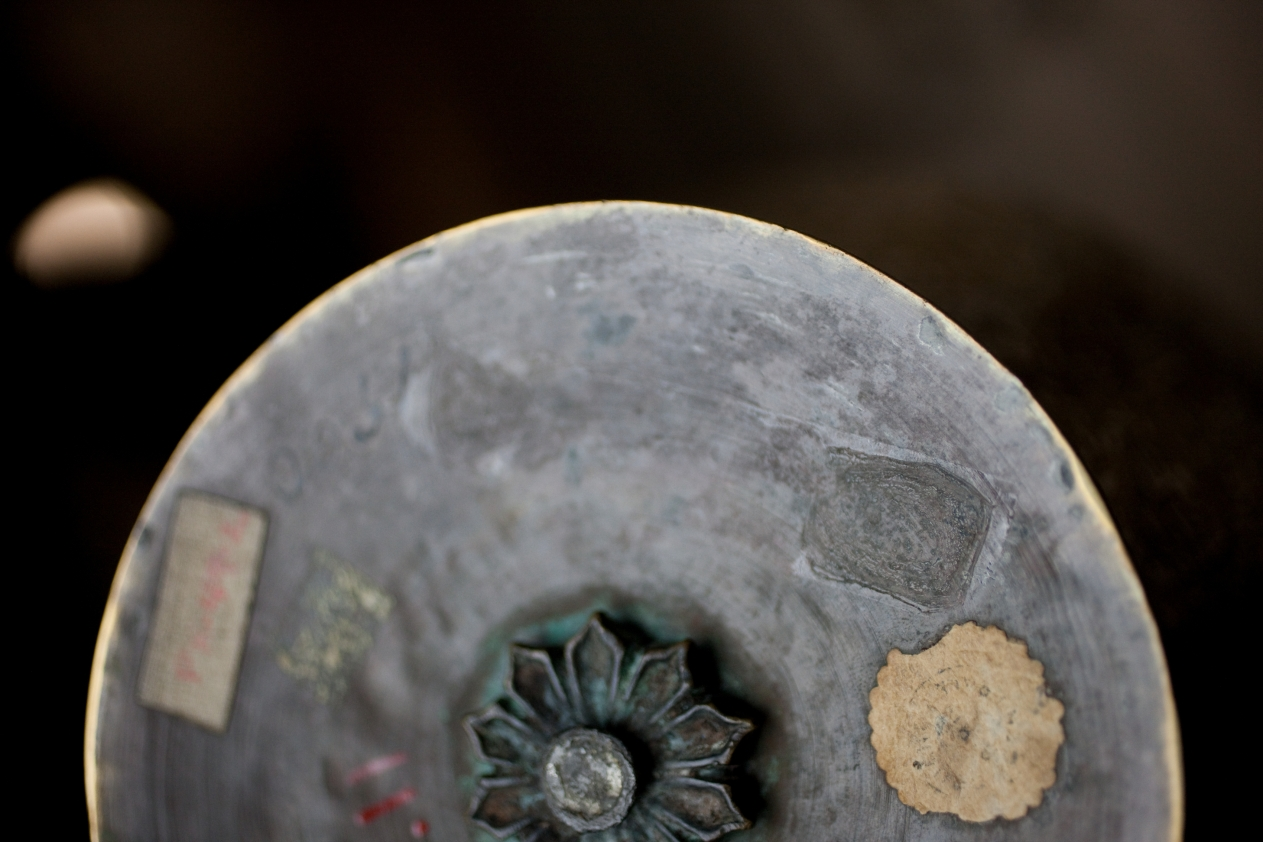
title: Luxury Ewer Extending Good Fortune to the Owner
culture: Iraq, possibly Mosul, Zangid or Artugid Period, 13th Century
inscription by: Ahmad al-Dhaki al-Mawsili (Iraqi, Mosul, active early 1200s?)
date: 1223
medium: brass inlaid with silver; lid and base added later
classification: Metalwork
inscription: Band on the neck (naskh): "Work of Ahmad al-Thaki, the engraver, al-Mawsili, in the year 620 and glory to my owner"; band at the base of the handle (naskh): "Work of Ahmad al-Thaki al-Mawsili"; graffiti of later owners, roughly scratched into the neck of the ewer: "Husayn ibn Qasim"; "Usta al-Muhtasib [?]"; band on the shoulder of the ewer (plaited, animated kufic): "Good luck, and learning, and commanding respect, and prosperity, and pride, and generosity, and faithfulness, and affection, and glory, and survival, and justice, and blessings, and exaltedness, and prosperity, and everlasting peace, and charitable giving."; band on the foot (naskh) [foot is a later addition]; this inscription has not yet been deciphered.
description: This silver inlaid ewer was produced for luxury clientele. The wide band around the body of the vessel displays vignettes of daily and courtly life contained within multilobed medallions. Some of the scenes feature falconry, hunting, dancing, and several groups of musicians. All these scenes are set off against a skillfully executed arabesque background—a pervasive motif in Islamic art characterized by interwoven vegetal and curvilinear elements. An inscription around the ewer’s shoulder extends good fortune, prosperity, and peace to the owner. The ewer is dated 1223 and signed by the master craftsman Ahmad al-Dhaki of Mosul.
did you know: Later owners roughly scratched their names into the neck of the ewer.